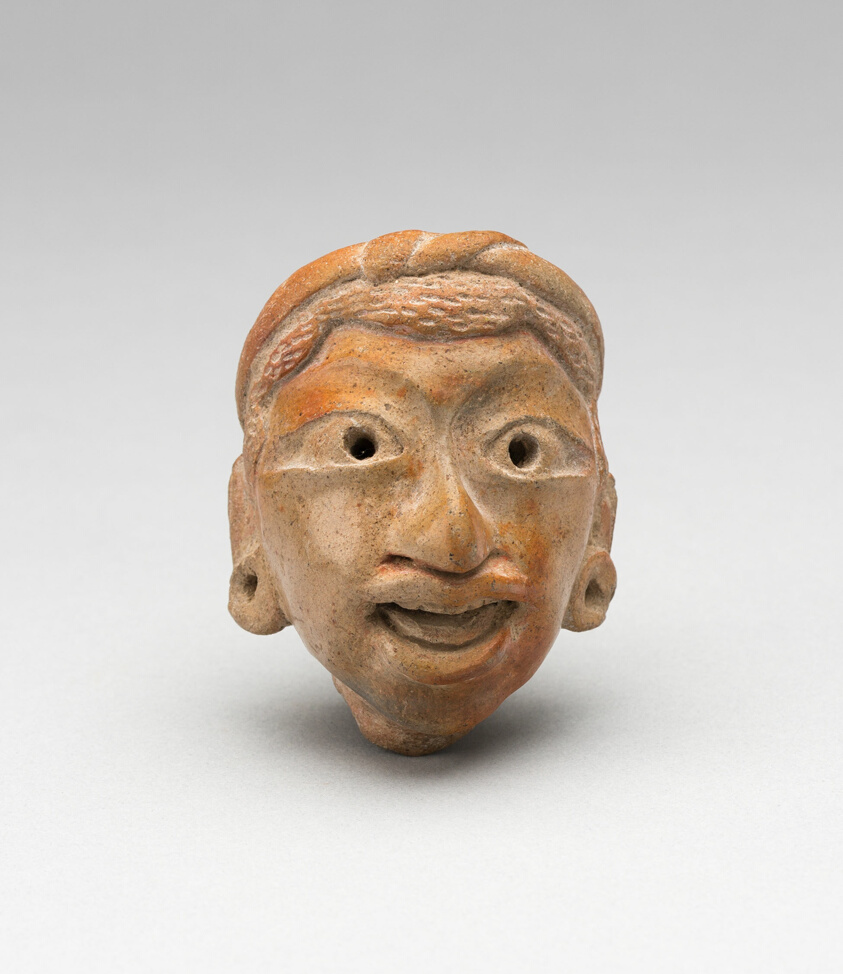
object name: Sculpture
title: Head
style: huastec, americas, Arts of the Americas, mesoamerican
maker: Huaxtec; Possibly Pánuco River Valley, Veracruz, Mexico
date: 800–1400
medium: Ceramic and pigment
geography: Veracruz state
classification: earthenware; art of the americas; ceramics; sculpture